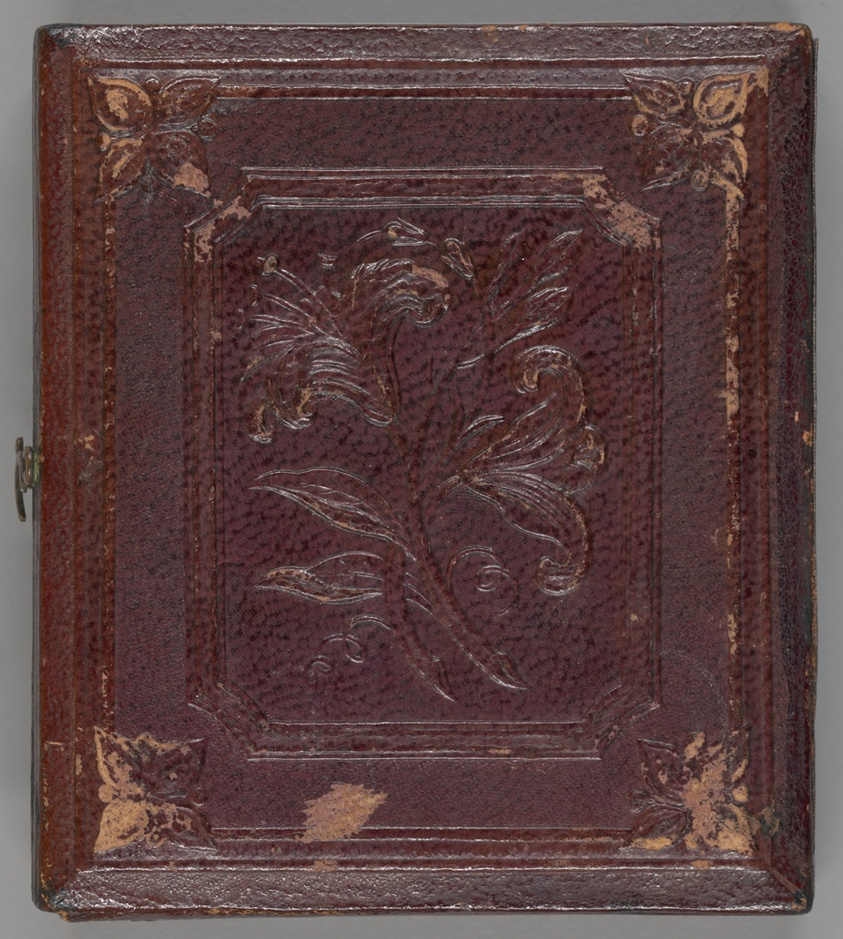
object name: Photograph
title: Untitled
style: 19th century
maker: Artist unknown; 19th century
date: 1839/60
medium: Daguerreotype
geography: Unknown Place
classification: daguerreotype; photographic process; photography; photograph